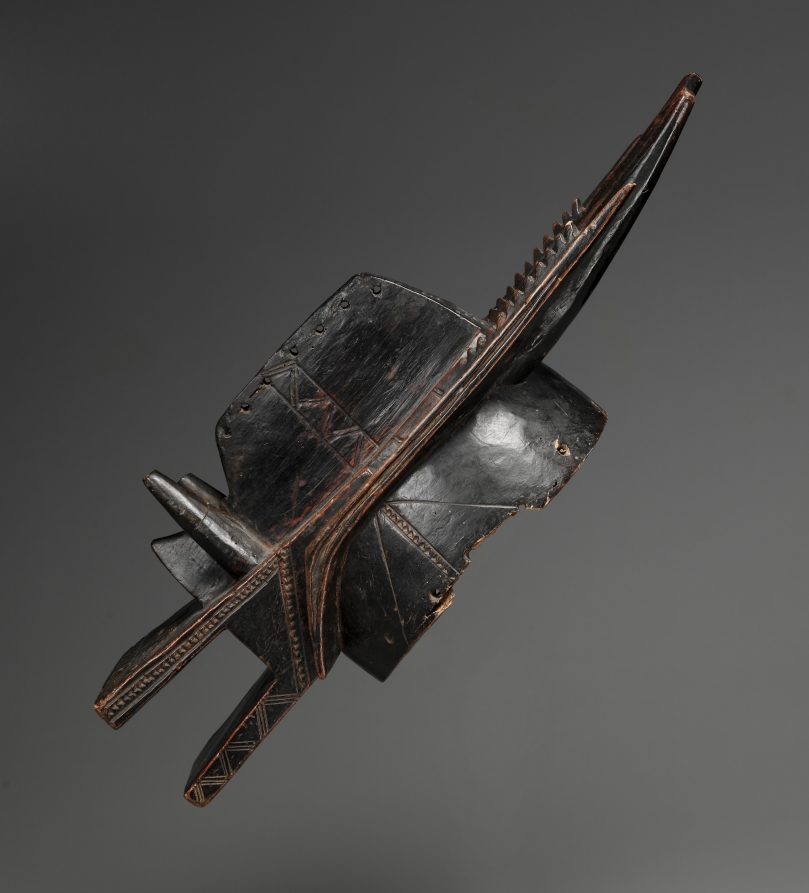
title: Helmet Mask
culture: Africa, West Africa, Mali, Malinke-style blacksmith-carver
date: mid- to late 1800s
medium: Wood and probably resin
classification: Mask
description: Combining animal and human traits, this example of a genre of mask called suruku, meaning “hyena,” most likely belonged to the Korè, one of six power associations that the Malinke would have adopted from their Bamana neighbors. The Korè is concerned with the circumcision and initiation of male youths into adulthood. The mask probably served as one of the symbols of the different Korè classes.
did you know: Holes along the top ridge of this mask once held a crest made of cane, red fibers, and cowrie shells.